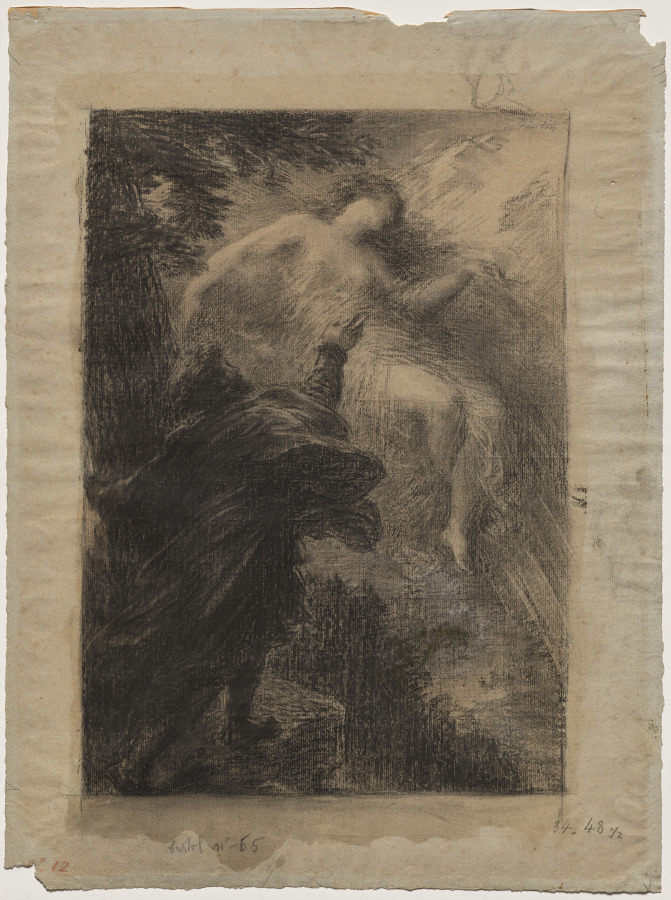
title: Fairy of the Alps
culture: France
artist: Henri Fantin-Latour (French, 1836–1904)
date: c. 1885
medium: charcoal with white chalk and black chalk, with framing lines in black crayon and squaring marks in graphite, on laid paper discolored to tan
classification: Drawing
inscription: signed, upper right, in charcoal: Fantin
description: Henri Fantin-Latour’s drawings featured imaginative compositions, often inspired by the music of contemporary German composers. This sheet relates to the symphonic work Manfred by Robert Schumann (1848), a drama in which Manfred encounters apparitions while mourning his lost lover. Fantin used layers of dark charcoal to evoke the emotional tenor of his subject and to translate the experience of listening to Schumann’s music using a visual medium.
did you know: This drawing relates to a print of the same year. Fantin used this sheet to work out his composition before completing a drawing on tracing paper, which was then used to transfer the image to a lithographic stone.